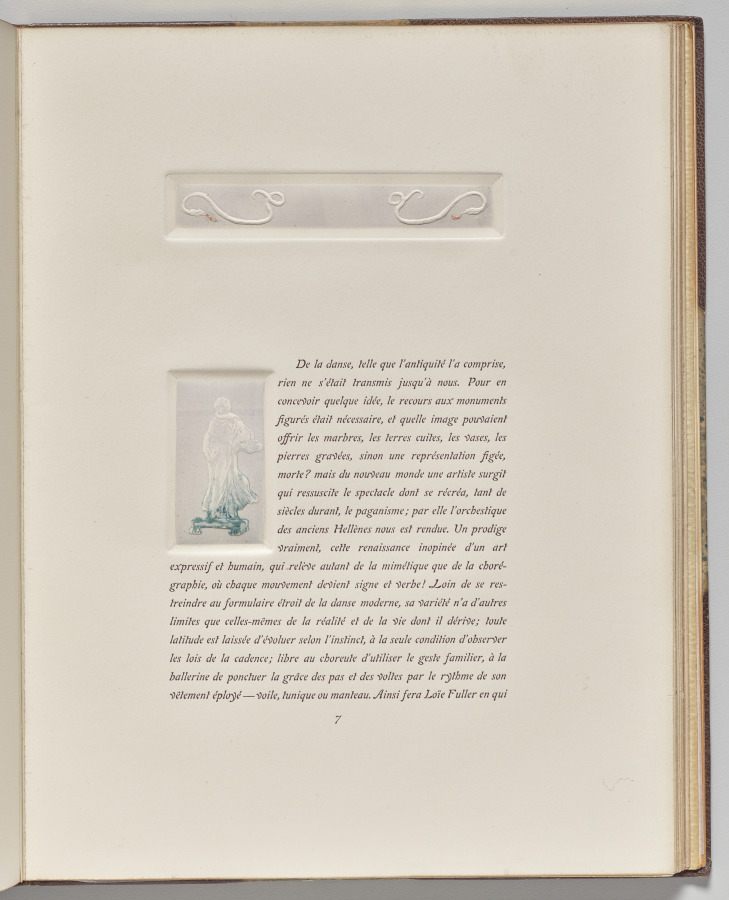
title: Decorative Motif/ Small Standing Figure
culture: France, early 20th Century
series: La Loïe Fuller, by Roger Marx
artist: Pierre Roche (French, 1855–1922)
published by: Les Cents Bibliophiles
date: 1904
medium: gypsograph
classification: Bound Volume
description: Although best known as a sculptor, Roche was a versatile and prolific artist who worked in many mediums. Loïe Fuller, the pioneer of modern dance who took Paris by storm in 1892, was one of his favorite subjects. He portrayed her in clay, bronze, marble, plaster, and in a series of gypsographs that illustrated an essay by the art critic Roger Marx. The book was described as "a precious monument to Loïe Fuller."